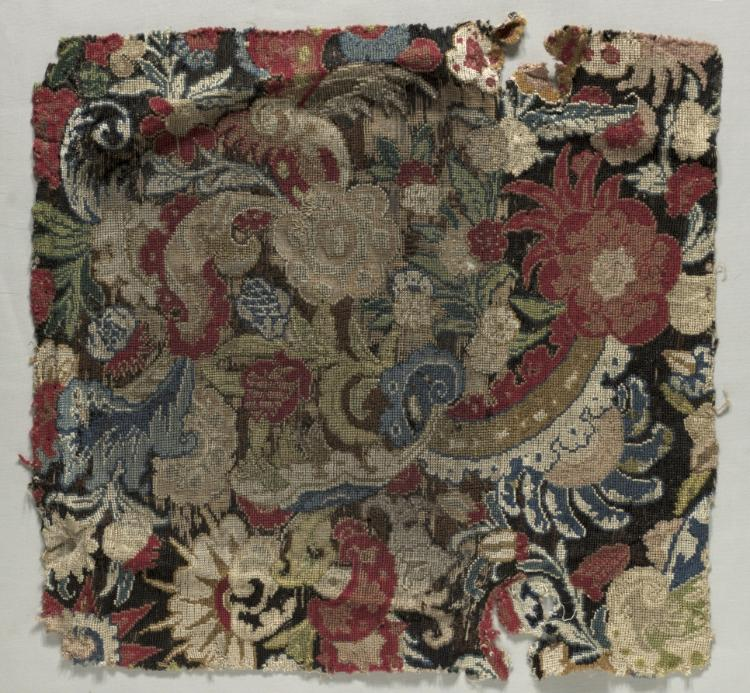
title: Armchair seat cover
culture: England, period of James II, 17th Century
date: 1685–1690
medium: needlepoint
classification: Embroidery